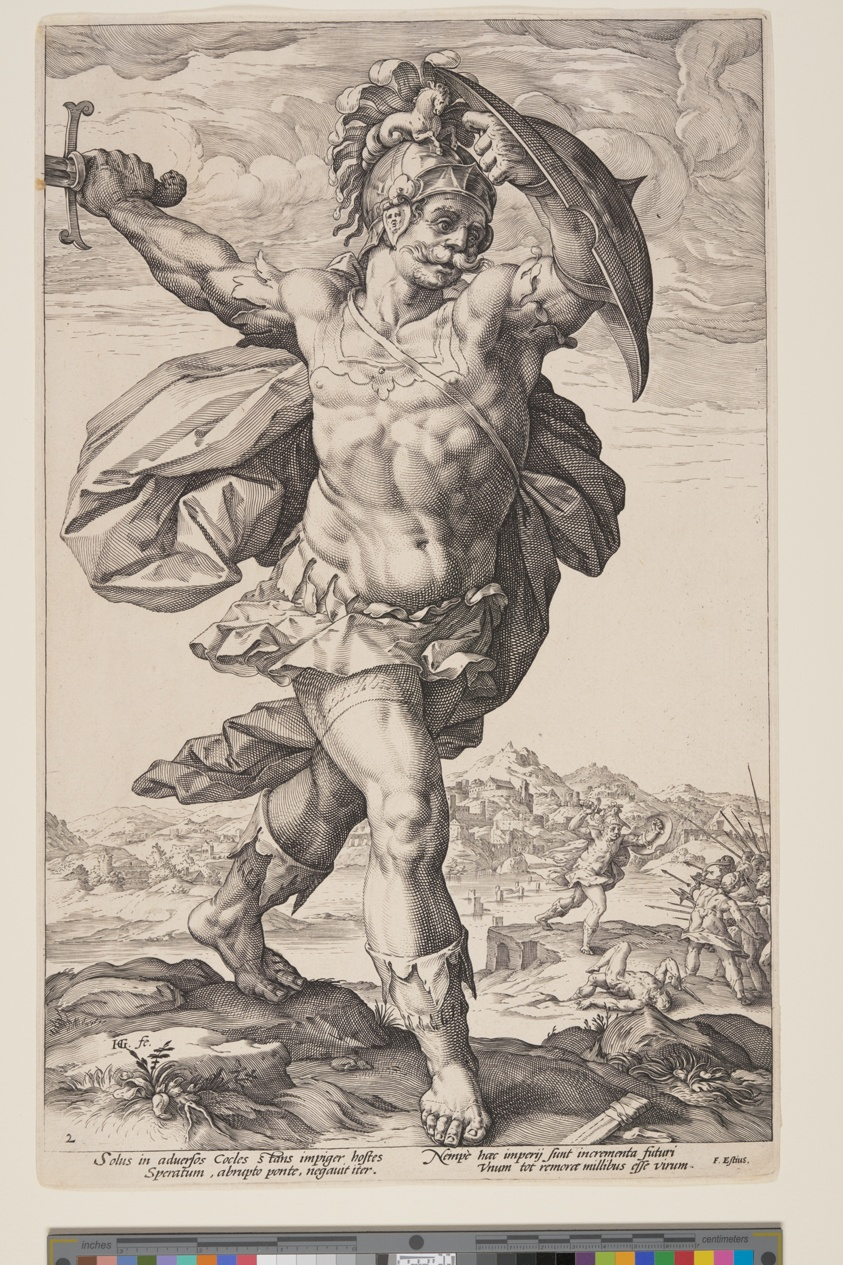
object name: Print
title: Horatius Cocles, from The Roman Heroes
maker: Hendrick Goltzius (Dutch, 1558–1617)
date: 1586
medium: Engraving on ivory laid paper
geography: Netherlands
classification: print; paper; prints and drawing; engraving